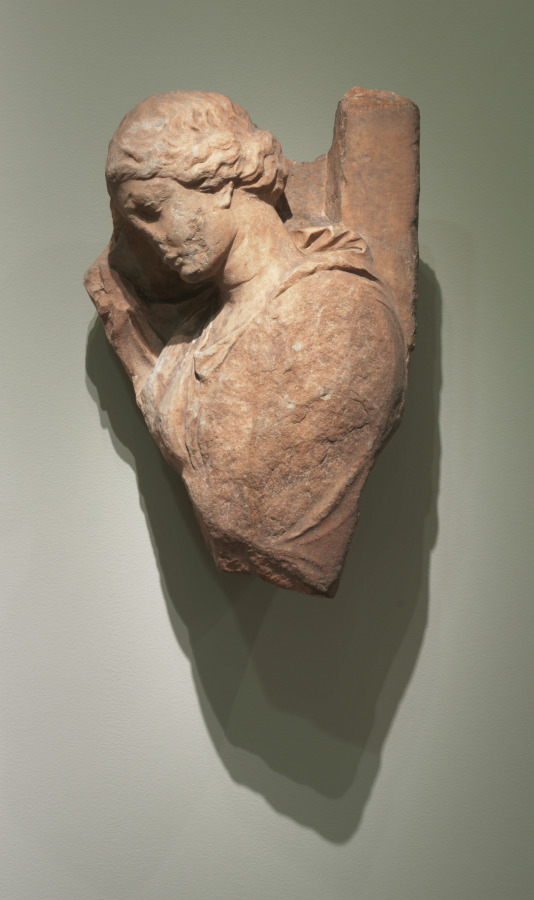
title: Grave Stela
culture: Greece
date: 400–350 BCE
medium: pentelic marble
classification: Sculpture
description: Carved in high relief, the original composition of this Attic grave marker can be reconstructed by comparison with the famous stele of Hegeso in Athens. With downcast eyes, the seated matron is dressed in a himation (cloak). Much of the lintel above is missing. It would have included an inscription with her name. The deceased is represented in a common domestic setting. The mood is somber and contemplative without any overt expression of mourning.